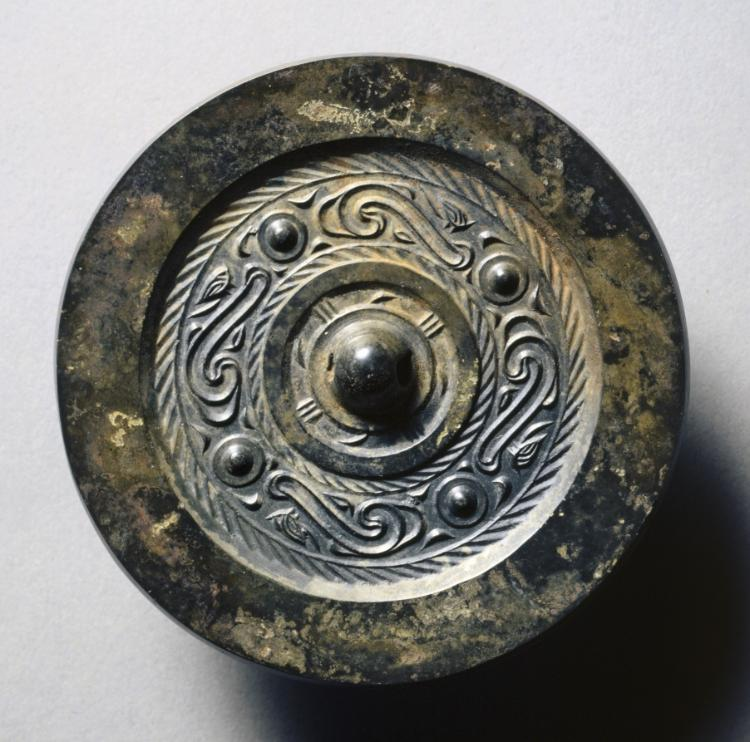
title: Mirror with Four Nipples, Quasi-Dragons, and Birds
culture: China, Western Han dynasty (206 BCE–8 CE)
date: 100–1 BCE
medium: bronze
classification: Metalwork